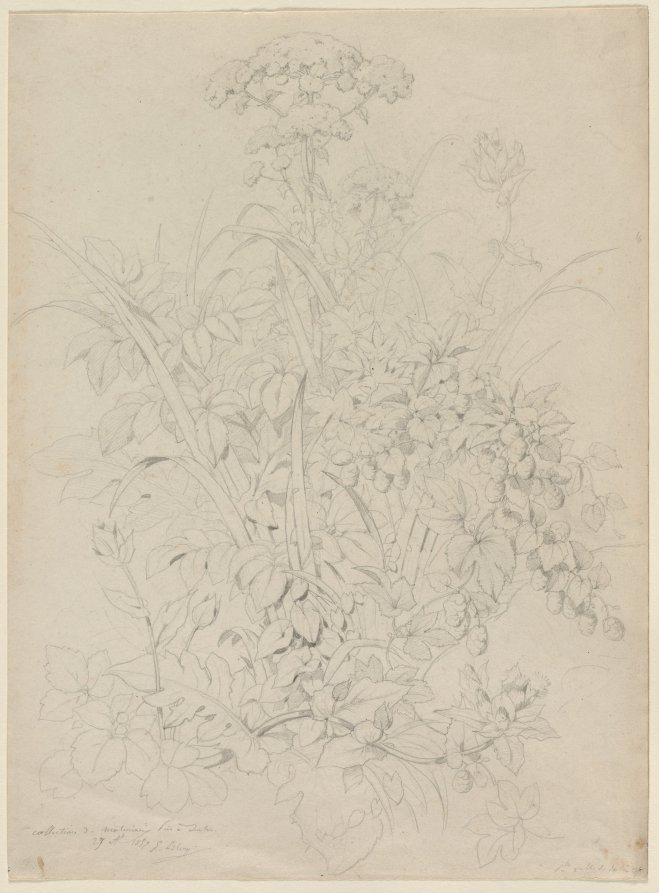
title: Plant Study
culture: France, 19th century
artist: Eugene Bléry (French, 1805–1886)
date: 1857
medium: graphite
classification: Drawing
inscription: signed, lower left, in graphite: collection [illegible] / 27 [illegible] 1957 E. Bléry ; by artist, lower right, in graphite: [illegible]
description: In addition to his landscapes, Bléry also produced closely focused botanical studies gracefully composed with an acute realization of species. Although he did not work alongside the artists of the Barbizon school, Bléry’s plant portraits are related to the aesthetic of Barbizon naturalism.